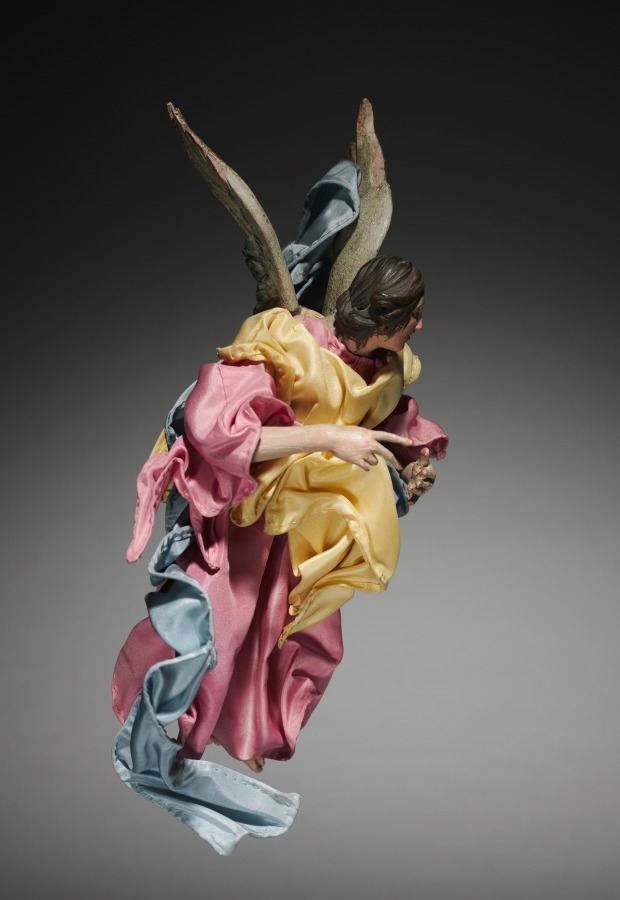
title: Figure from a Crèche: Angel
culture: Italy, Naples, late 18th-early 19th century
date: 1780–1830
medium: painted wood and terracotta with various textiles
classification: Sculpture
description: The practice of creating scenes of the Nativity for the home dates from the early 1700s in Italy, where people began to set up doll-like figures of about a foot or less in height. The custom was particularly popular in Naples around 1800, where crèche scenes (crèche means cradle, or crib) included many figures, whose heads and hands of painted terracotta, stuffed cloth bodies, and clothing adapted from contemporary local costumes gave them an amazingly realistic character. Representations of the birth of Jesus can be traced to the first few centuries of Christianity. Both living creatures and sculptural depictions of them were used from early times. By the late middle ages it was customary to create life-size figures of wood or stone, naturalistically painted, to represent the characters who participated in the events of Jesus's early life. These sculptures were then arranged in scenes illustrating one or both of the most important of these events, the Adoration of the Shepherds and the Adoration of the Magi-the three kings from the East who came to pay homage to the Christ child. Used in churches, these large figures were especially popular in Italy, Central Europe, Spain, and Portugal. This Object in Focus presentation was organized by Henry Hawley, Curator of Renaissance and Later Decorative Arts and Sculpture.